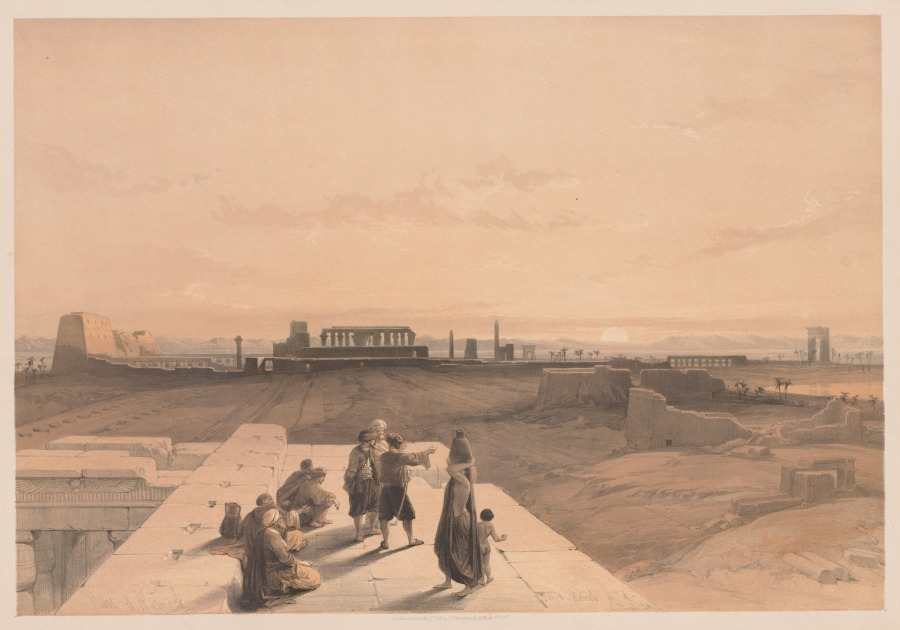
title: Egypt and Nubia: Volume I - No. 38, Ruins of Karnak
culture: England, 19th century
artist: Louis Haghe (British, 1806–1885)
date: 1838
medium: color lithograph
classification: Print